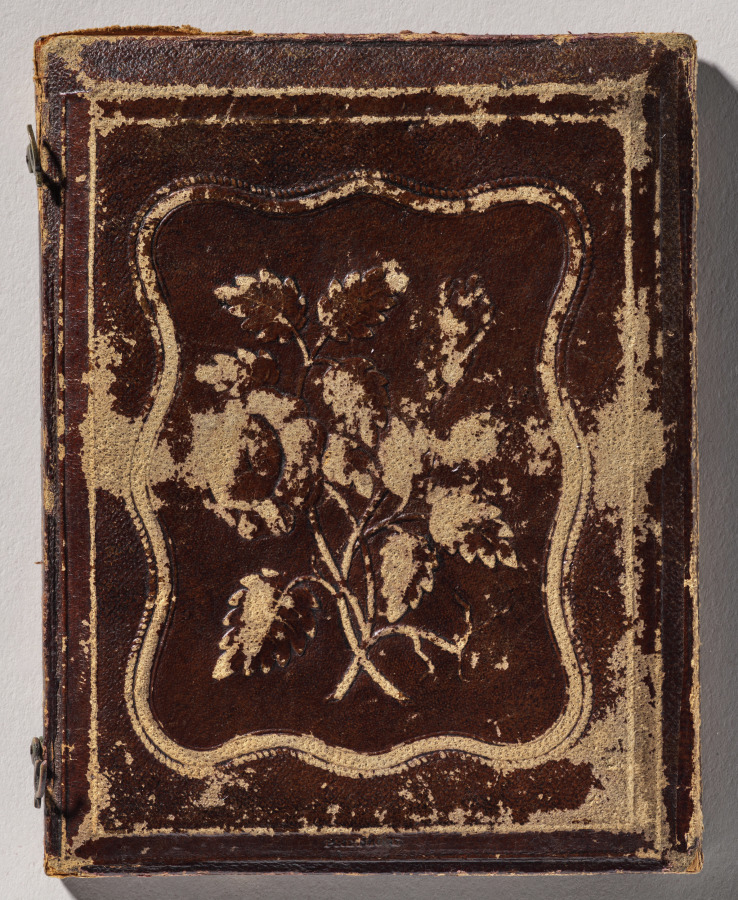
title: Two Children with Toys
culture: America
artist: Unidentified Photographer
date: c. 1855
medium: daguerreotype, quarter-plate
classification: Photograph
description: Children have always been particularly cherished subjects for photography. Portraits were made to preserve the memory of their stages of growth and, in an age when long-distance travel was rare, to share with faraway relatives. And, for a sadder reason: in 1840 an estimated one-third of children died before age five. Photography offered grieving parents the opportunity to immortalize their children’s features. This tragic genre of photographs, later called “post-mortems,” often depicts the children in fine clothing, laying down with eyes shut, as if merely napping.